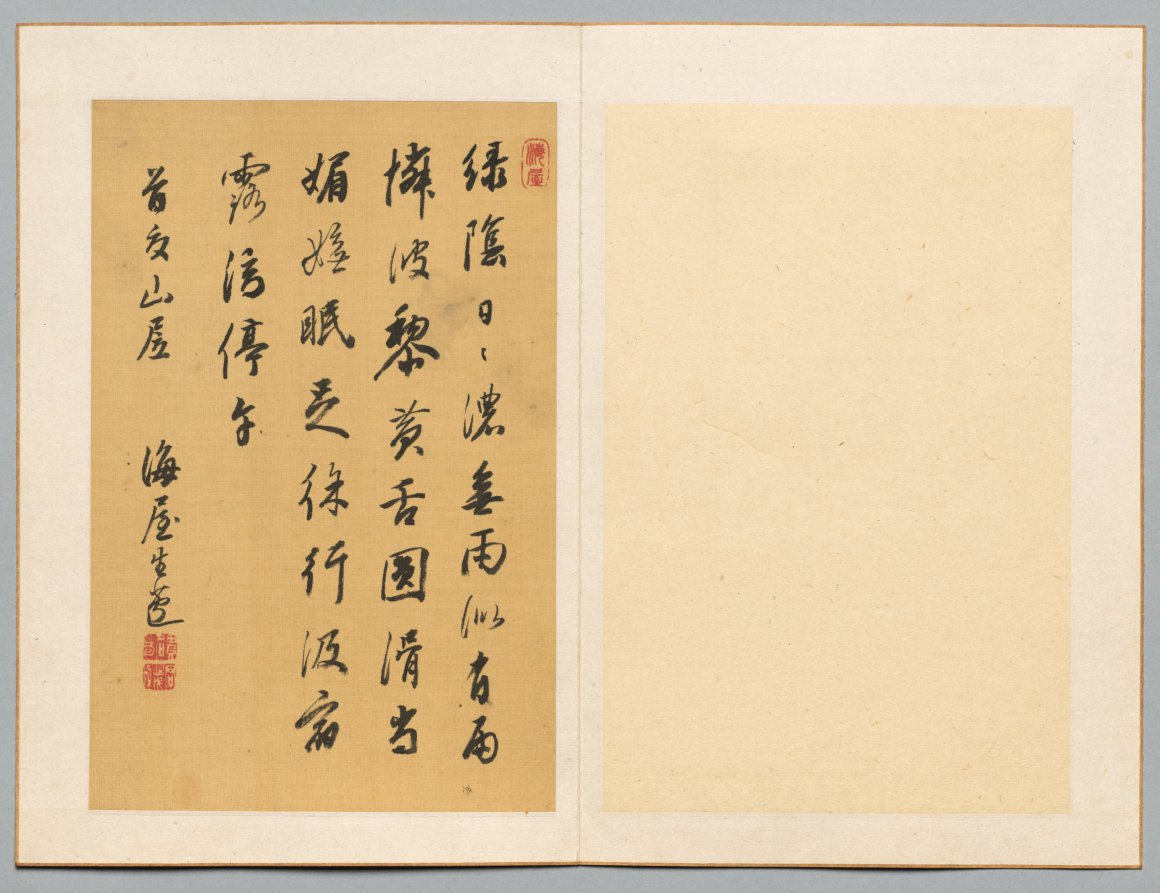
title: Poem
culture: Japan, Edo period (1615–1868)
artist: Nukina Kaioku (Japanese, 1778–1863)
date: early to mid-1800s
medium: leaf from a pair of folding albums; ink on silk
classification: Portfolio